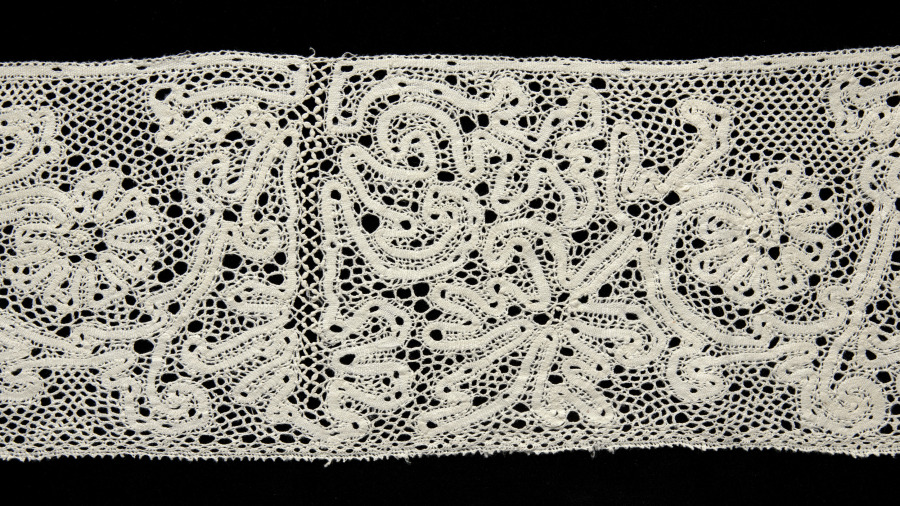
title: Lace Edging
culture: Italy, Abruzzi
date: 1700s–1800s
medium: Bobbin lace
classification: Lace